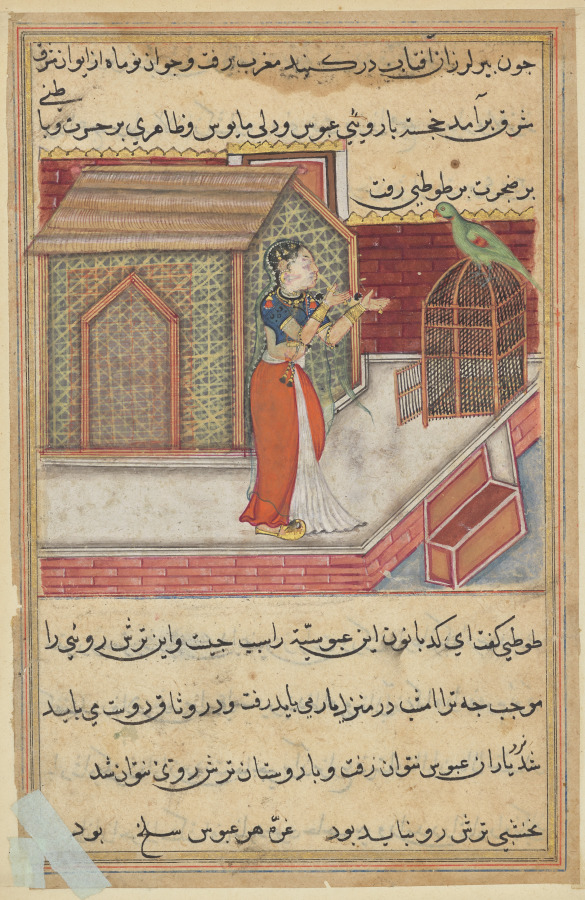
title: The parrot addresses Khujasta at the beginning of the forty-ninth night, from a Tuti-nama (Tales of a Parrot): Forty-Ninth Night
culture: Mughal India, court of Akbar (reigned 1556–1605)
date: c. 1560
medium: gum tempera, ink, and gold on paper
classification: Painting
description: On the forty-ninth of fifty-two nights, Tuti the wise, talking parrot tells Khujasta a moralizing story about three brothers, two of whom aged prematurely, while the third remained young. The story lasts until sunrise, and Khujasta is unable to leave to visit her lover.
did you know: The original underdrawing is visible where the paint has flaked from Khujasta’s face.